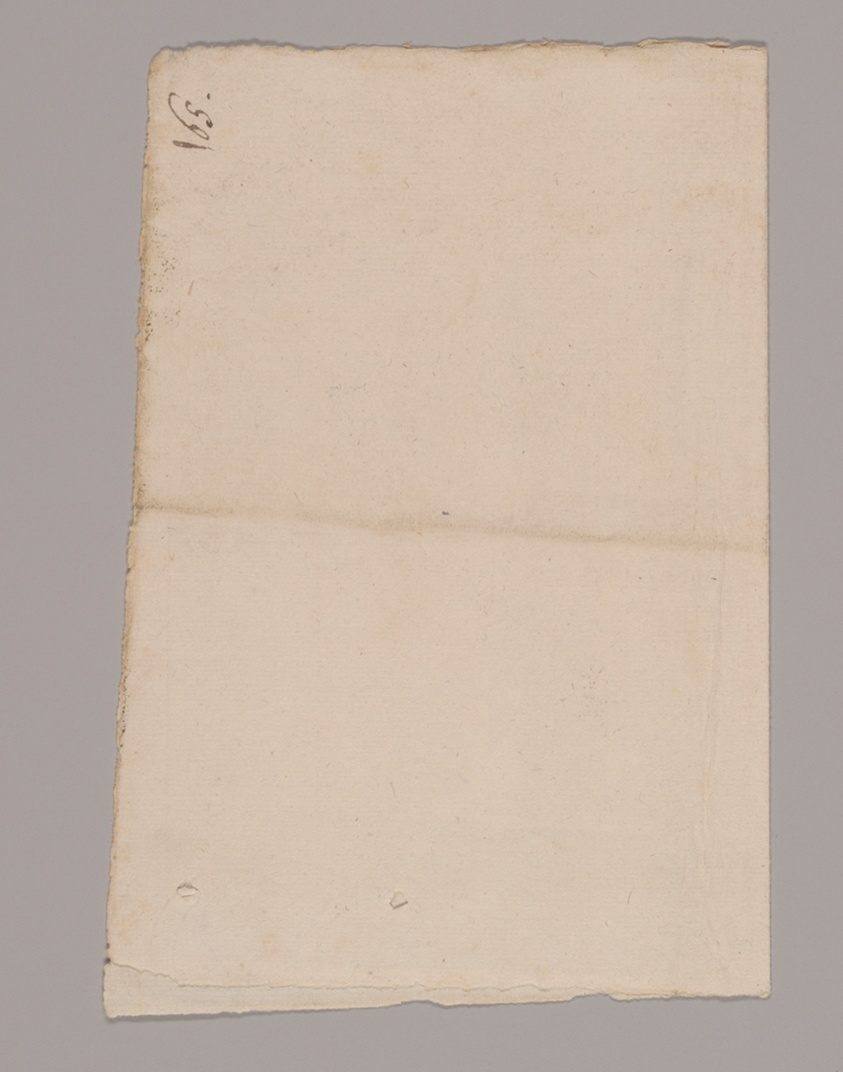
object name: Print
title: Sight, from The Five Senses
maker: Raphael Sadeler I (Flemish, 1560/61–1628/32); after Maarten de Vos (Flemish, 1532–1603)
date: 1581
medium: Engraving on paper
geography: Flanders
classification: engraving; paper; print; prints and drawing